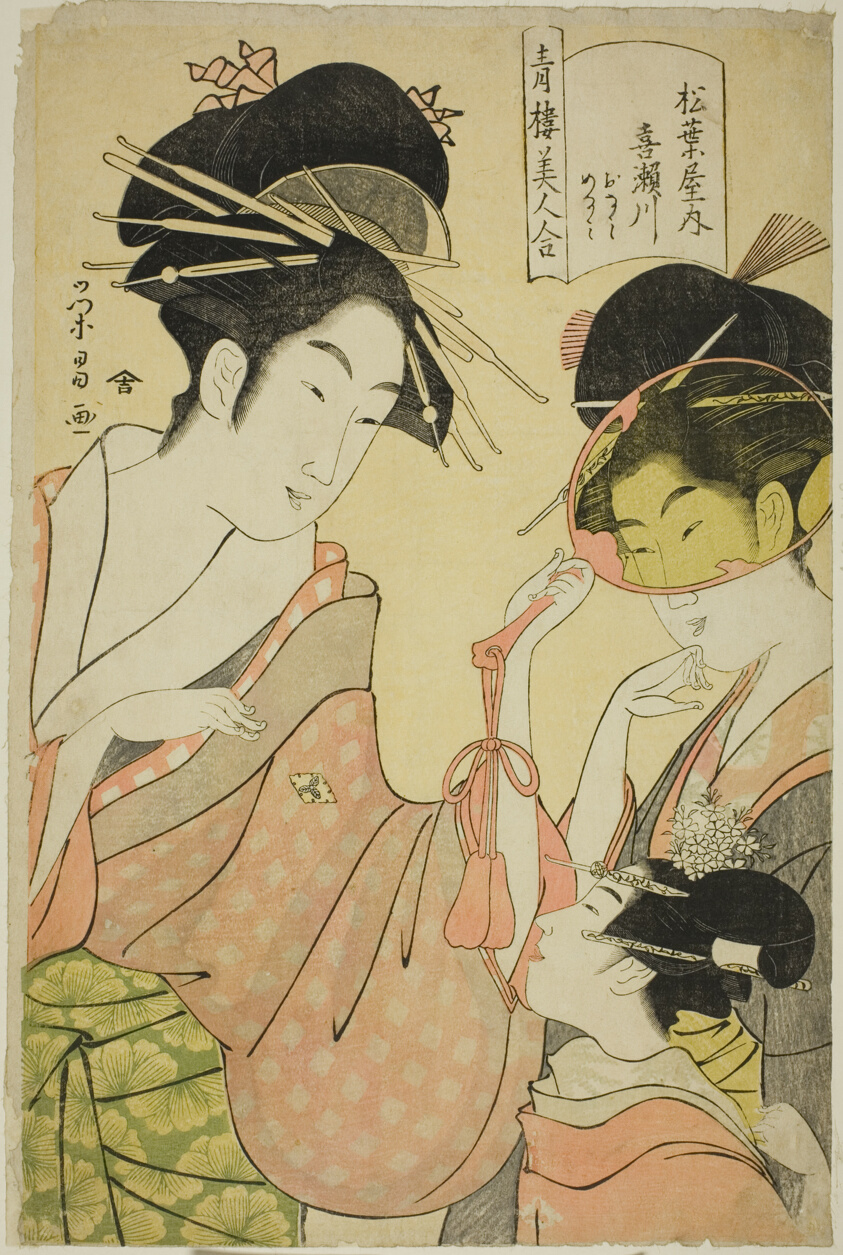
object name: Print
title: Beauties of the Pleasure Quarters (Seiro bijin awase): Kisegawa of the Matsubaya with Attendants Onami and Menami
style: Japanese (culture or style)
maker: Chobunsai Eishi; Japanese, 1756-1829; Publisher: Yama-Kichi; Japanese, Unknown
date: c. 1797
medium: Color woodblock print; oban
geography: Japan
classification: woodblock print; print; asian art